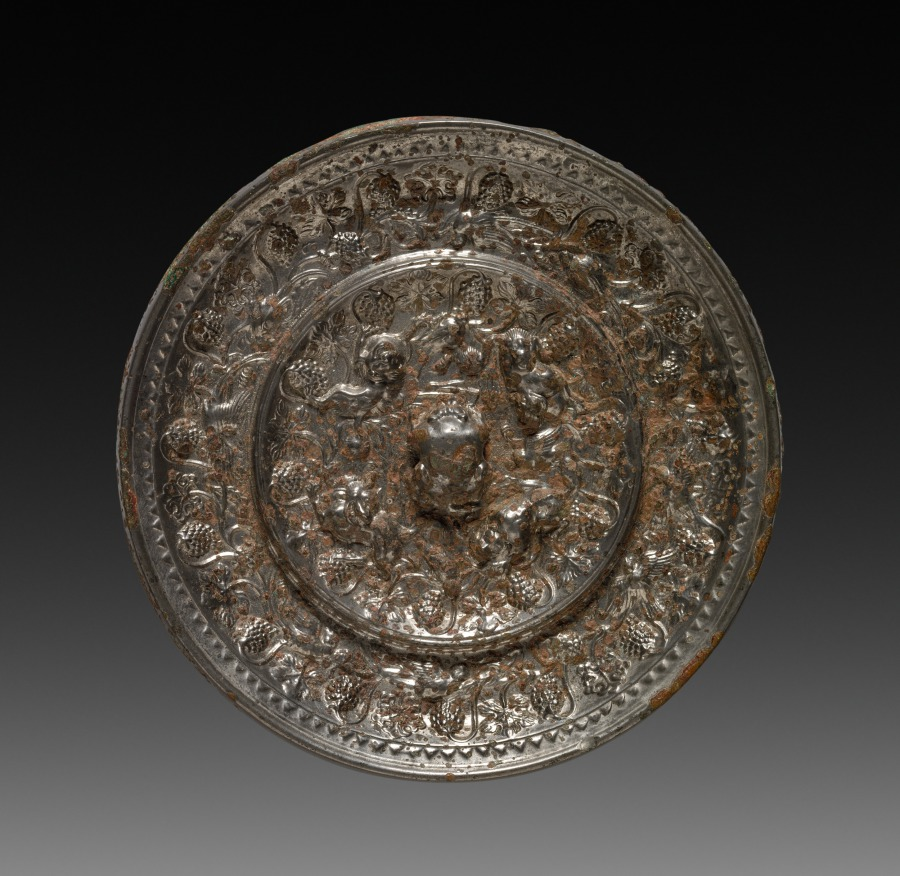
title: Mirror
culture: China, Tang dynasty (618-907)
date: 618–907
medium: bronze with silver inlay in lacquer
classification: Metalwork